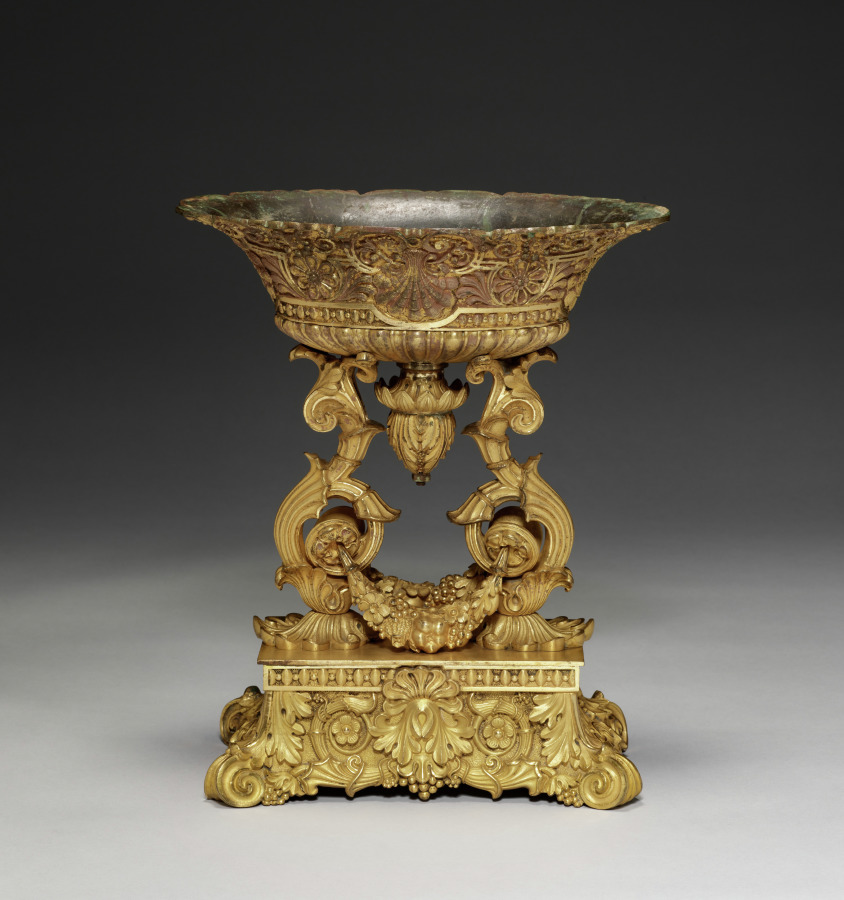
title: Centerpiece, or Jardinière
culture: France, Paris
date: c. 1830–1850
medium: gilt bronze with enamel flowers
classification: Metalwork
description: Regrettably, a maker's mark does not appear on this piece: thus the factory that made it remains unknown. Nevertheless, its design, castings, and gilding are of fine quality and indicate that it is the product of a group of talented craftsmen who worked in the robust taste of the second quarter of the 19th century.